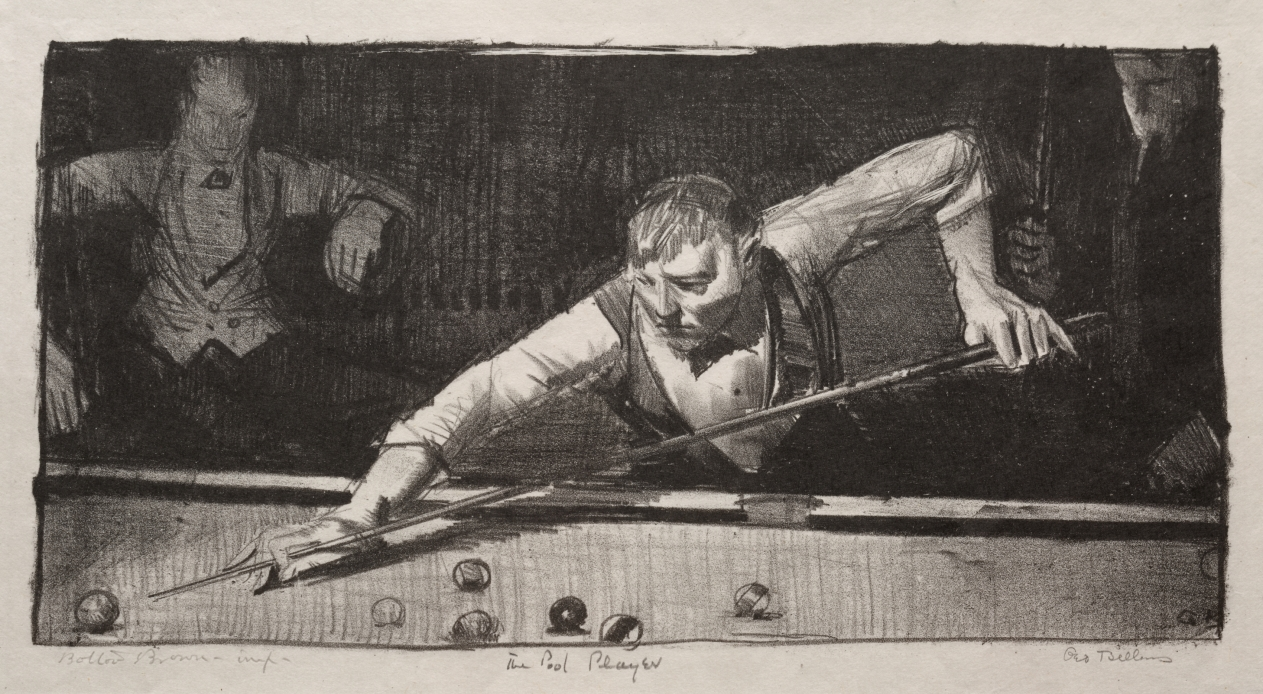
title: The Pool Player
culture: America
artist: George Bellows (American, 1882–1925)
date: 1921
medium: lithograph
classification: Print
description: A single overhead light illuminates the pool player’s careful concentration and agile pose while casting two rapt companions in shadow. The figure on the left is believed to be Bellows’s self-portrait.